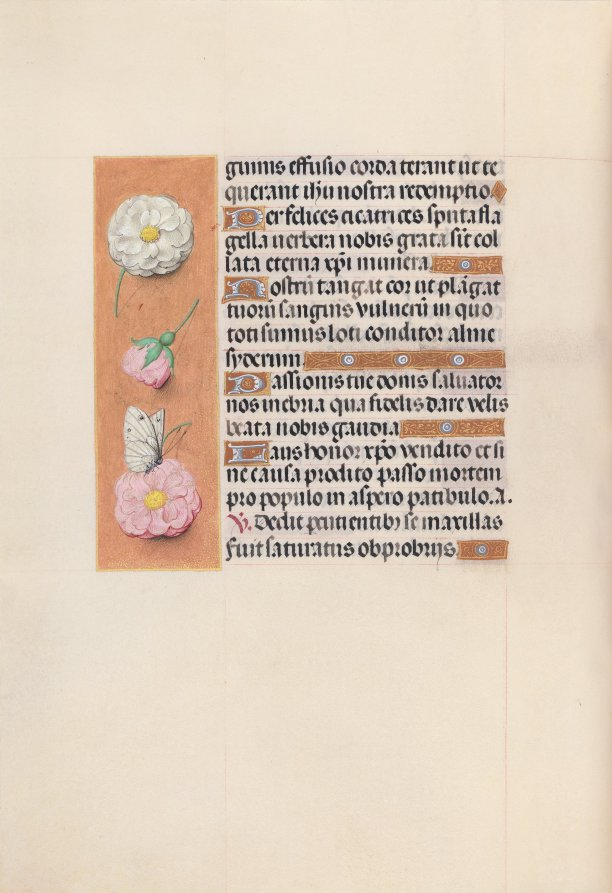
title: Hours of Queen Isabella the Catholic, Queen of Spain: Fol. 58v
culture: Flanders, Ghent and Bruges, late 15th century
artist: Master of the First Prayerbook of Maximillian (Flemish, c. 1444–1519)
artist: and Associates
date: c. 1500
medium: ink, tempera, and gold on vellum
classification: Bound Volume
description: This manuscript was illuminated by a circle of at least five highly organized manuscript painters active in the Flemish cities of Ghent and Bruges. The principal illuminator was Alexander Bening, who painted the majority of the book's miniatures. Manuscripts produced by this circle of artists are renowned for the decoration of their borders, which typically feature a rich variety of realistically-painted flowers, birds, and butterflies. This prayer book, called a book of hours, was intended not for a cleric, but for the private devotions of a lay person-in this case, Isabella the Catholic, Queen of Spain (1451-1504). Isabella's coat of arms embellishes the book's frontispiece. It is unlikely that the book was commissioned by the Queen herself; rather, she probably received it as a diplomatic gift from someone courting her patronage, perhaps Cardinal Francisco Jimenez de Cisneros. A Franciscan friar, Jimenez was dependent upon Isabella for his advancement, first to the post of Queen's confessor in 1492, and then to Archbishop of Toledo in 1495.